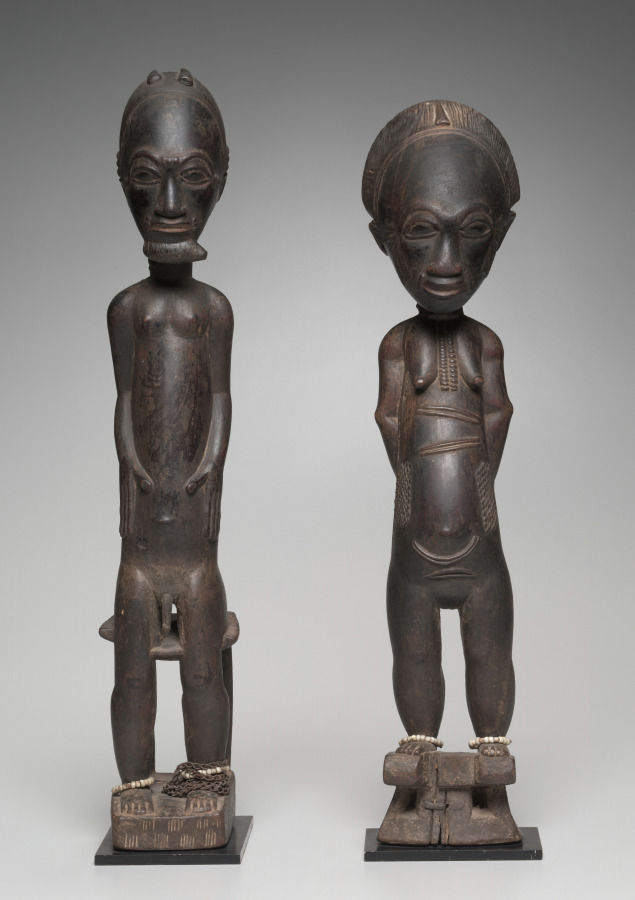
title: Figure Pair (asye usu)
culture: Africa, West Africa, Côte d’Ivoire, Baule-style carver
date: late 1800s–early 1900s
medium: Wood, resin, glass beads, plant fiber, and metal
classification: Sculpture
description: Baule figures carved as pairs usually represent untamed spirits of the wilderness called asye usu. These spirits may intervene in the lives of individuals by taking possession of them. If this possession does not result in madness, it can lead to the human host’s becoming a diviner who can enter into a trance to reveal the causes of ailments and other misfortunes. People who feel their lives are being interrupted by the asye usu commission carvings representing idealized male and female forms whose grace and beauty in both anatomy and adornment will seduce the spirits and compel them to use the sculptures as their temporary homes.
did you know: Baule artists looked to the world around them to capture contemporary ideas and ideals of beauty; these figures have hairstyles that would have been worn when the sculptures were carved.